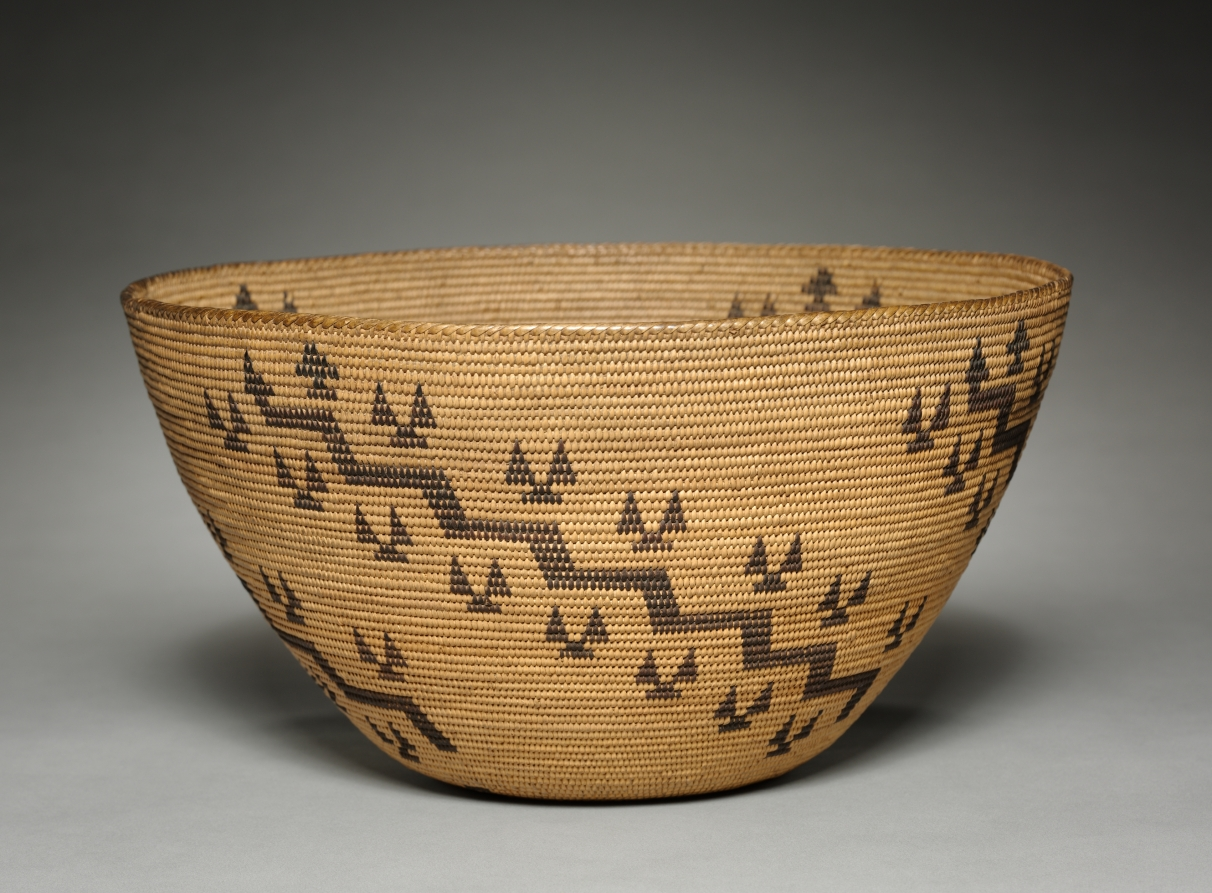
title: Cooking Bowl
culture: California, Mono, Lake Paiute, late 1800s–early 1900s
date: 1890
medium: willow, bracken fern; coiled (3 rods)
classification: Basketry